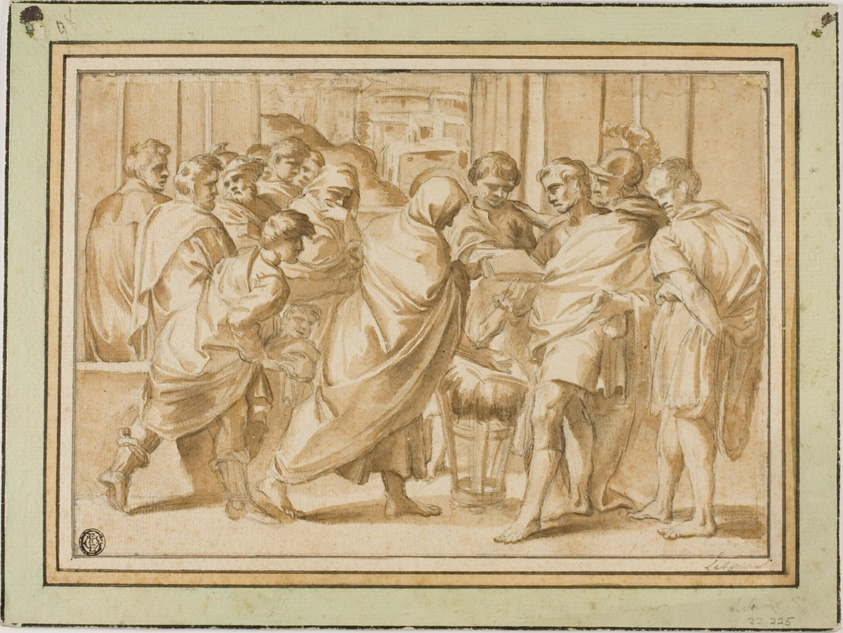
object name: Drawing and Watercolor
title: Scene from Roman History, with Draped Figure Presenting Book to Ruler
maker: Possibly after Eustache Le Sueur; French, 1617-1655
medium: Brush and brown wash, with black chalk, on tan laid paper, laid down on cream laid card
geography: France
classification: brush and wash; paper; drawings (visual works); prints and drawing